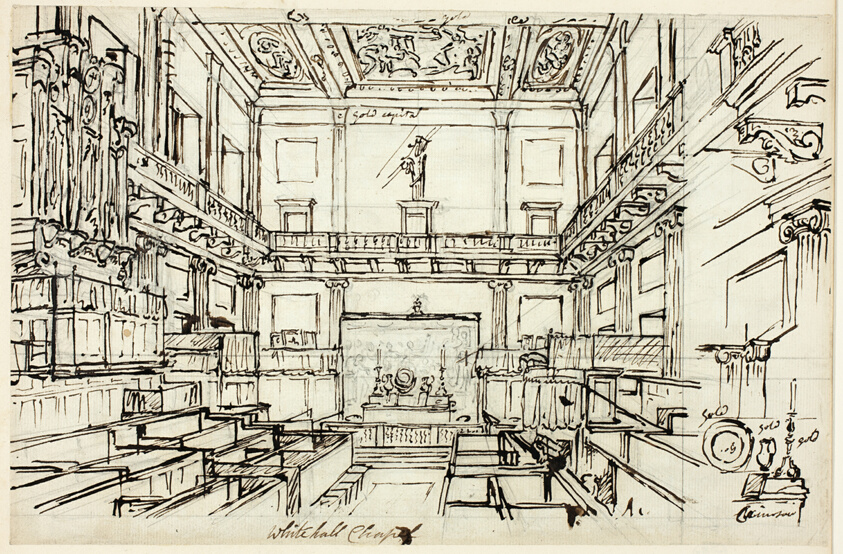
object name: Drawing and Watercolor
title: Study for Whitehall Chapel, from Microcosm of London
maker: Augustus Charles Pugin (English, born France, 1762-1832); Thomas Rowlandson (English, 1756-1827)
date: c. 1809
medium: Pen and brown ink over graphite on ivory laid paper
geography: England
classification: pen and ink drawings; prints and drawing; drawings (visual works)